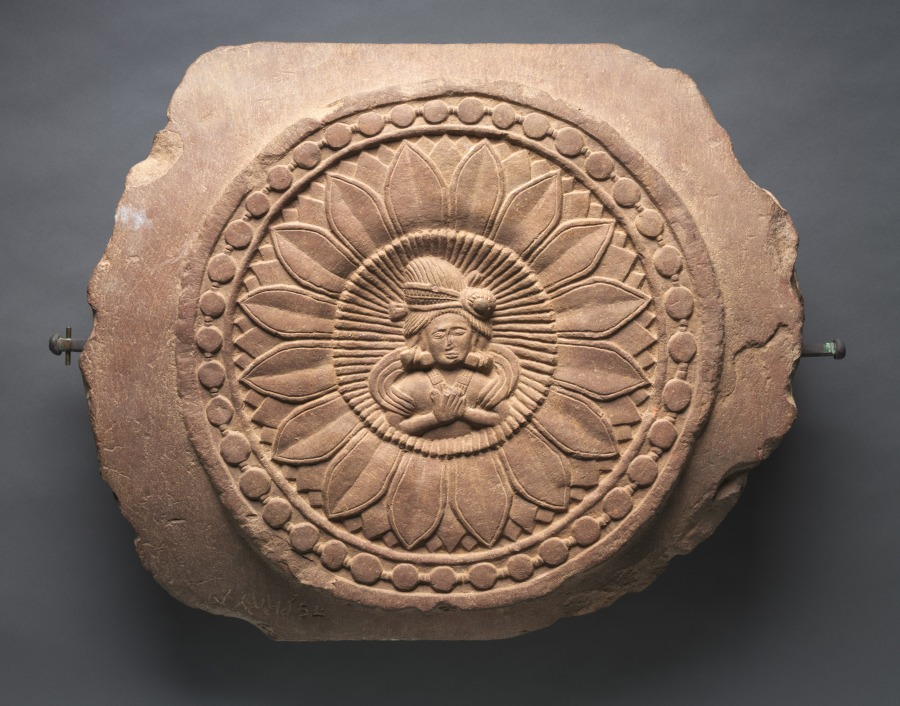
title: Double-Faced Crossbar from a Railing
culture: India, Madhya Pradesh, Bharhut, Shunga period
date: c. 150 BCE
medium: plum-colored sandstone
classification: Sculpture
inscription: Inscribed on recto: "Mitasa suchi danam"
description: This lens-shaped section of a crossbar is from one of the the earliest known Buddhist monuments in India to be embellished with stone relief carvings. It is from a circular fence that surrounded a stupa and demarcated the sacred space from the outside world.